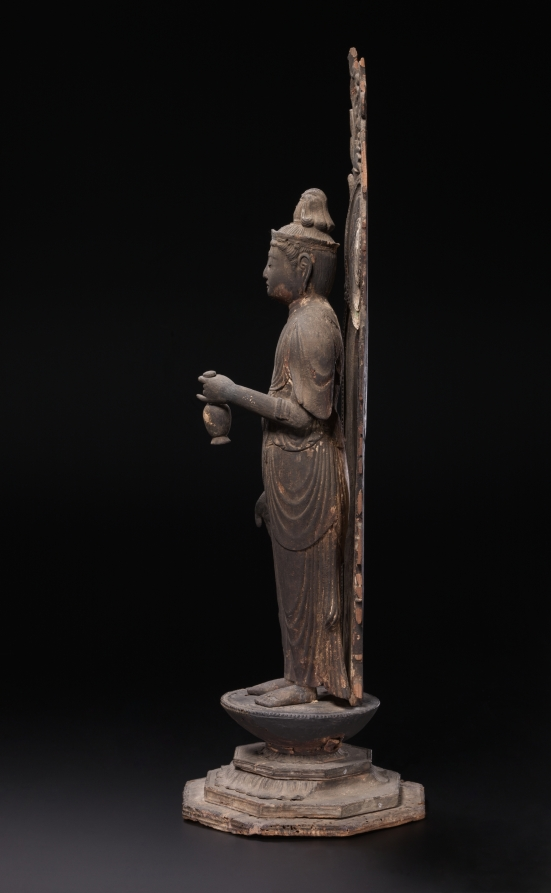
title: Miroku: Future Buddha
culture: Japan, Heian period (794–1185)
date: 1100s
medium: wood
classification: Sculpture